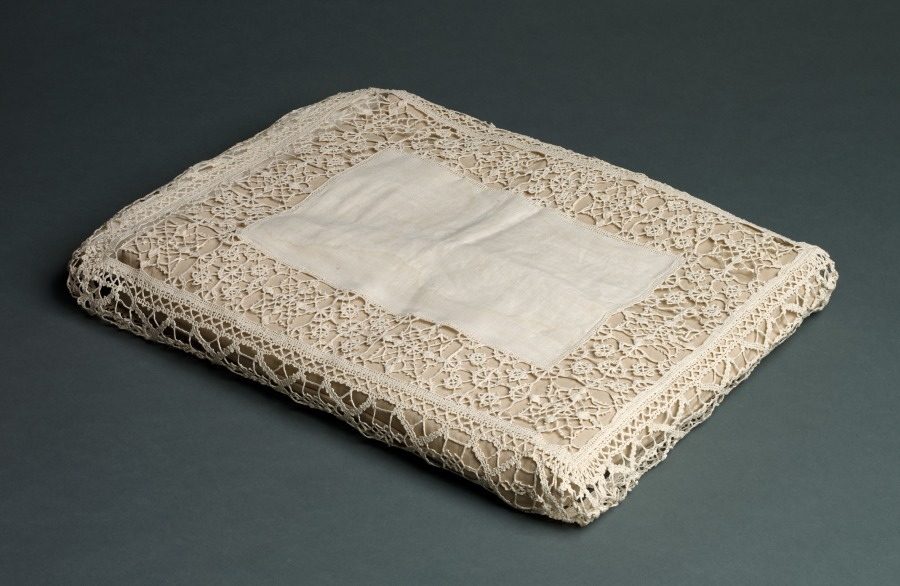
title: Lace Pillow Cover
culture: Italy, Venice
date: 1600s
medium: Plain weave linen (center): plaited bobbin lace edging that mimics needle lace (reticella)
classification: Lace